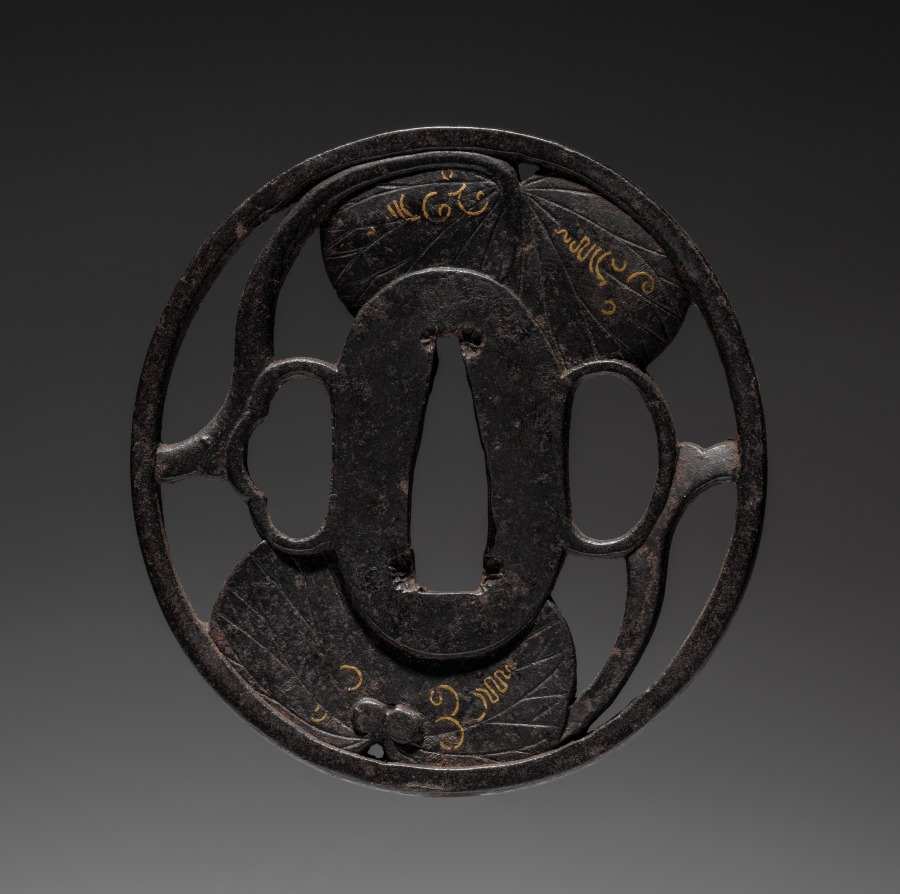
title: Sword Guard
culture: Japan, Edo period (1615–1868)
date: 1600s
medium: iron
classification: Arms and Armor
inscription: Signature: Kinai, residing in Echizen (province) made